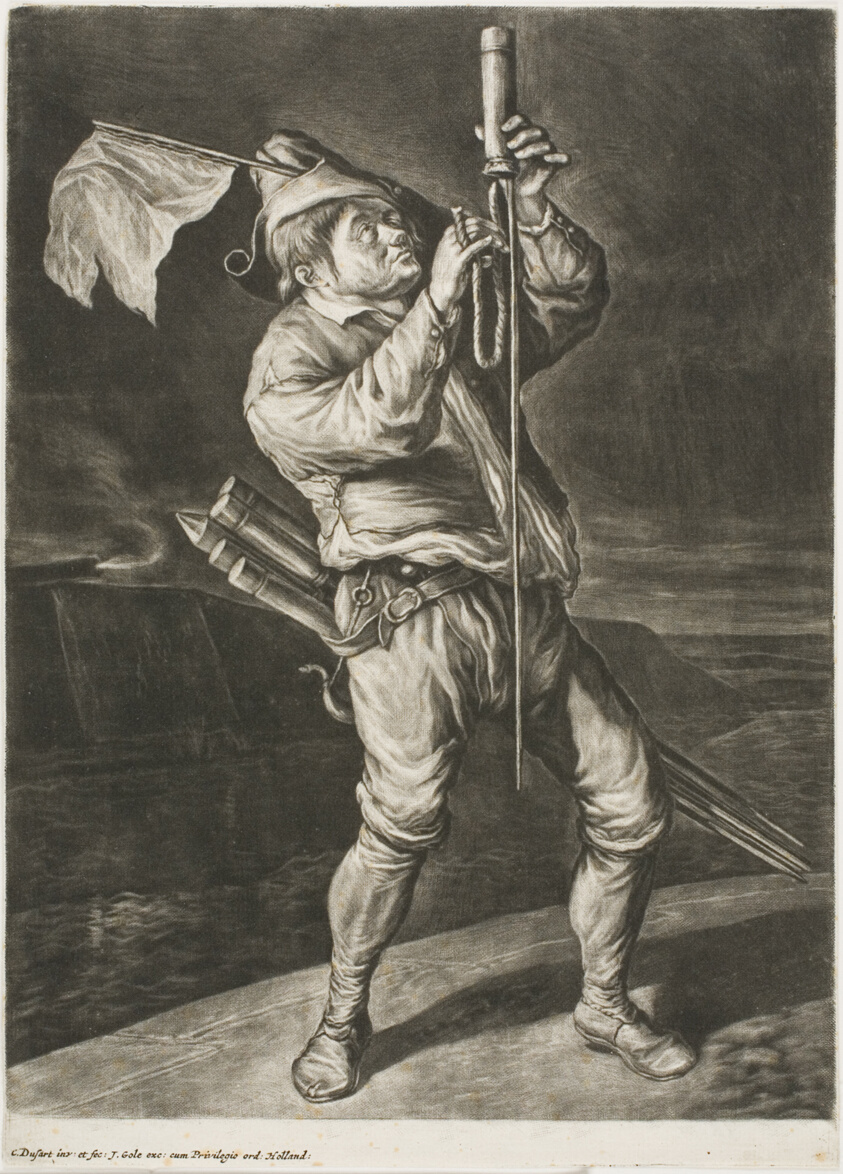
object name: Print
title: Man Lighting a Rocket, also called Peace is Better than a Victory, from Communia Gaudia (The Wide-Spread Rejoicing at the Siege of Namur)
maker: Cornelis Dusart (Dutch, 1660-1704); published by Jacob Gole (Dutch, 1660-1737)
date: 1695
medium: Mezzotint in black on ivory laid paper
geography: Holland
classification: etching; print; prints and drawing